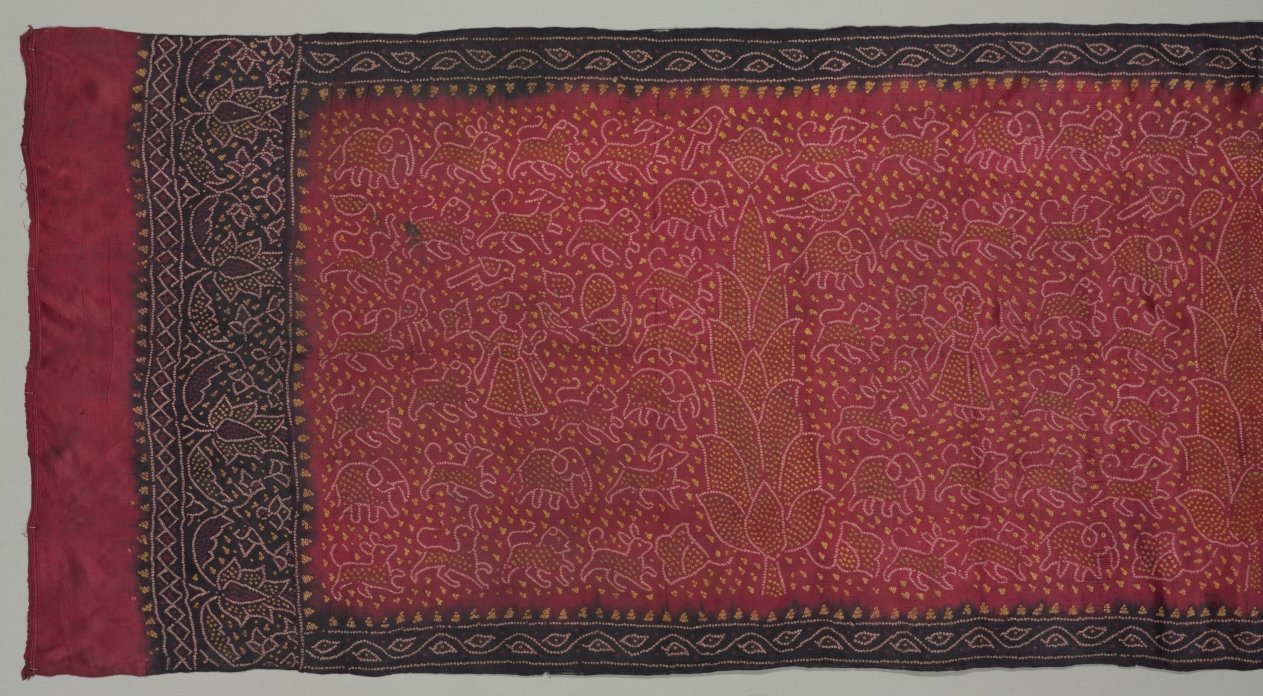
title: Sari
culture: India, Gujarat, 19th century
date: 1800s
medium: satin, tied and dyed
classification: Textile